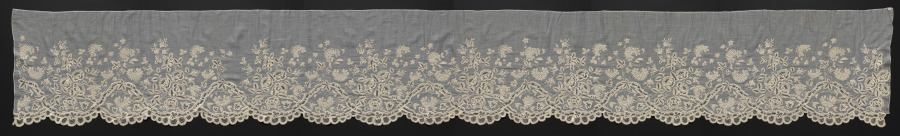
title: Flounce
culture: France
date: 1800–1820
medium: Plain weave cotton: embroidered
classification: Embroidery